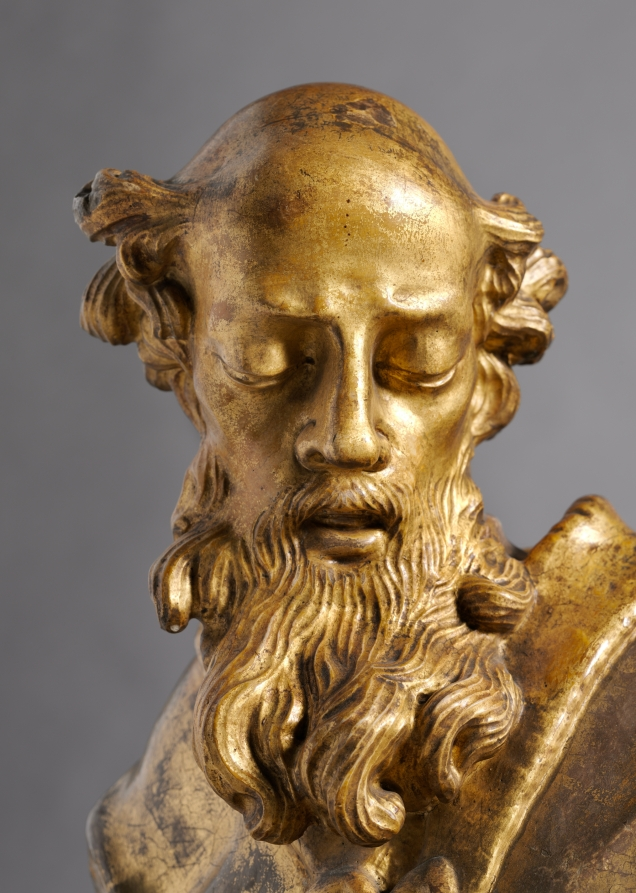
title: Saint Joachim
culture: Germany, 18th century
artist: Joseph Anton Feuchtmayer (German, 1696–1770)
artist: or Circle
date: c. 1760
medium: gilded wood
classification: Sculpture